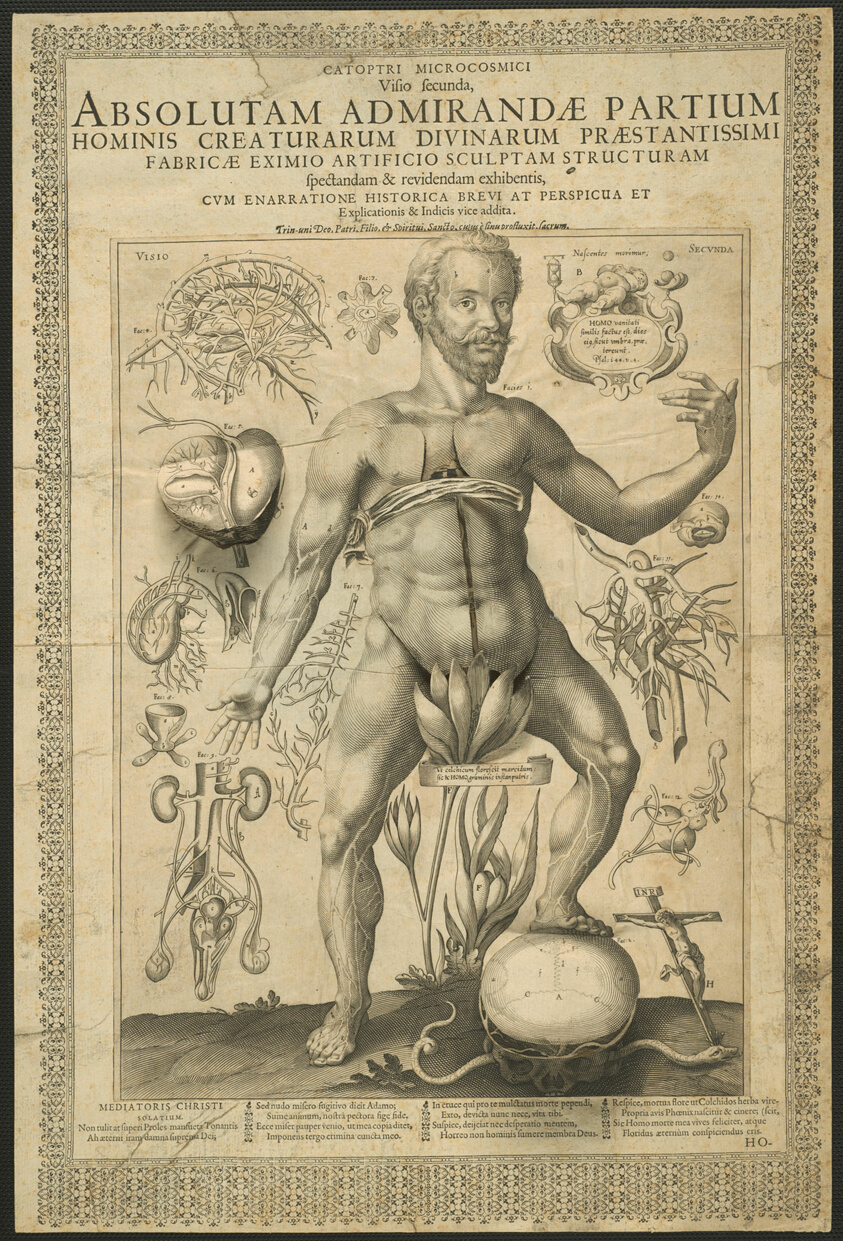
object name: Print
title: Second Vision, from Mirrors of the Microcosm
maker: Lucas Kilian (German, 1579-1637)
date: 1613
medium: Engraving on ivory laid paper, cut, with etching on ivory laid paper components, laid down on letterpress printed ivory laid paper, and mounted onto cream wove paper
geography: Germany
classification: engraving; print; prints and drawing